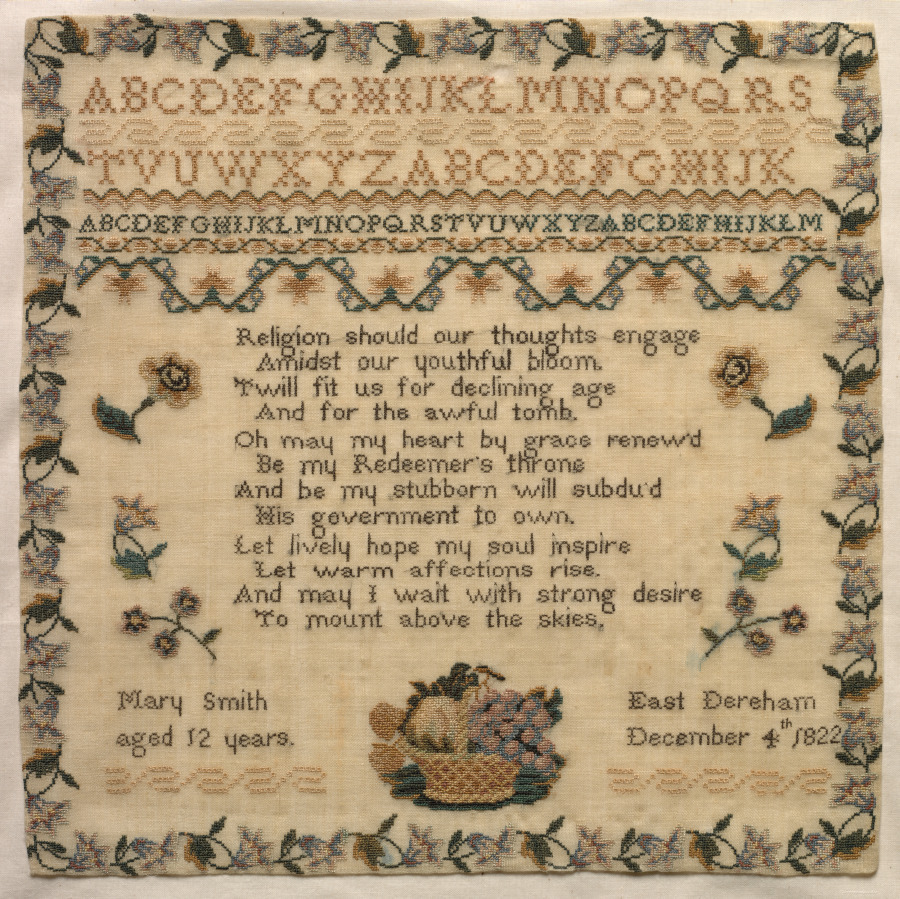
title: Sampler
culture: England, early 19th century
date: 1822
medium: embroidery; silk on woolen canvas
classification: Sampler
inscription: "ABCDEFGHIJKLMNOPQRS/TVUWXYZABCDEFGHIJK/ ABCDEFGHIJKLMNOPQRSTVUWXYZABCDEFHIJKLM/ Religion should our thoughts engage/ Amidst our youthful bloom./ Twill fit us for declining age/ And for the awful tomb./ Oh may my heart by grace renewd/ Be my Redeemer's throne/ And be my stubborn will subdu'd/ His government to own./ Let lively hope my soul inspire/ Let warm affections rise./ And may I wait with strong desire/ To mount above the skies./ Mary Smith East Dereham/ aged 12 years December 4th 1822."